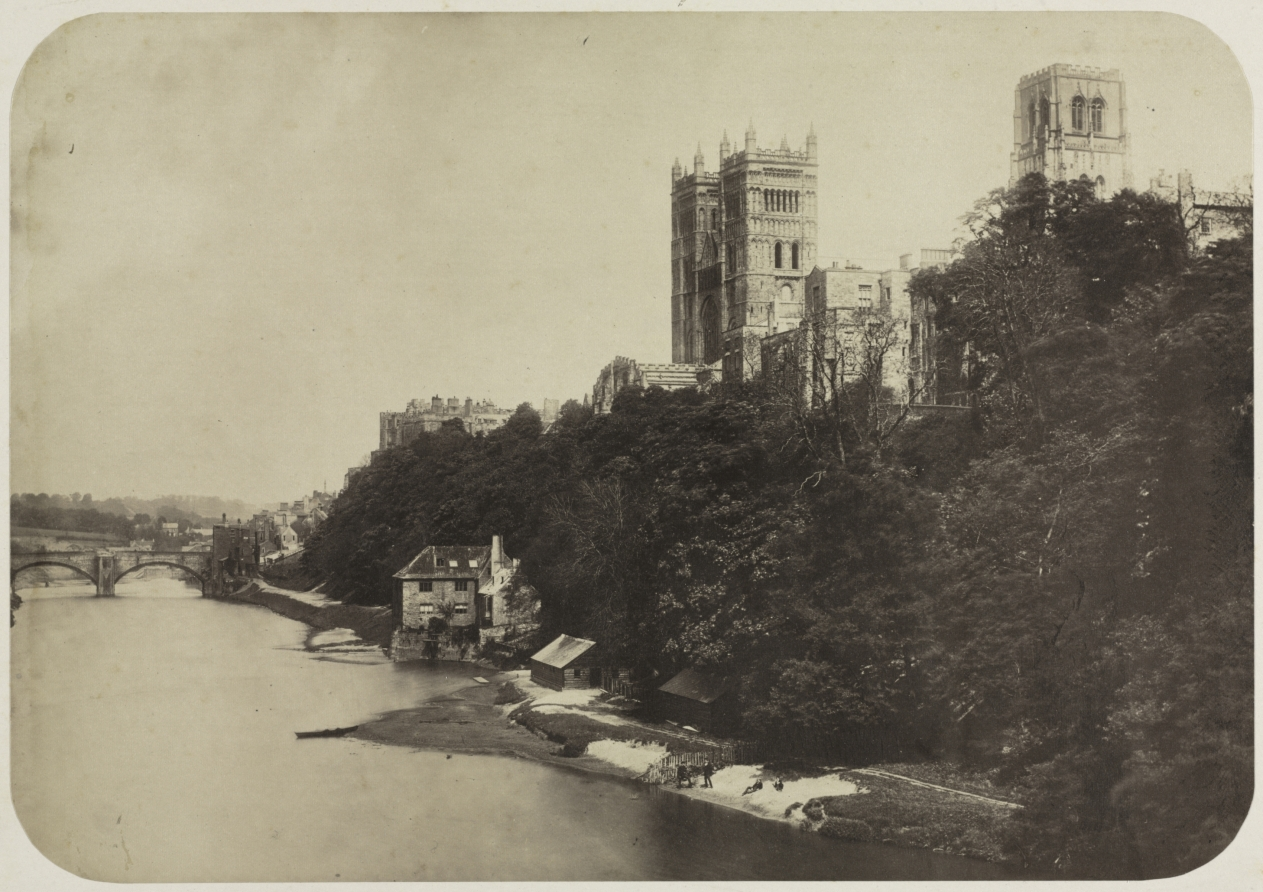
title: Durham Cathedral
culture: England, 19th century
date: 1858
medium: salted paper print, coated, from wet collodion negative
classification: Photograph